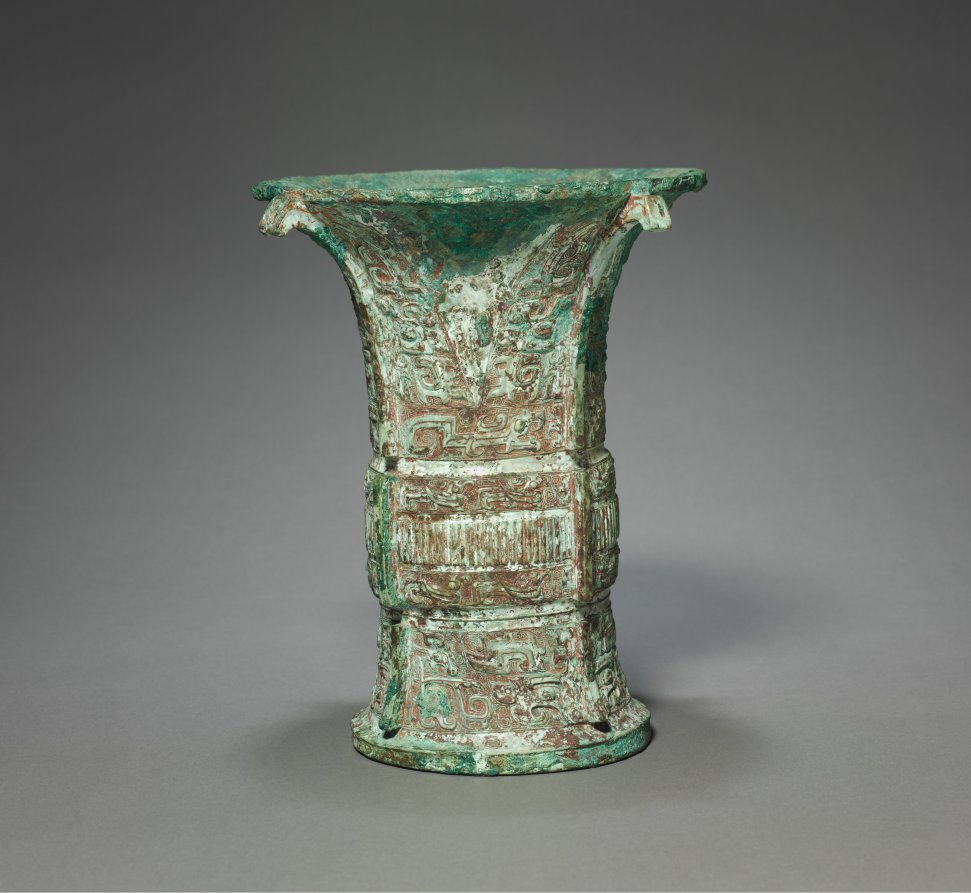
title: Wine Vessel (Fu Wu Zun)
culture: China, Western Zhou dynasty (c. 1046–771 BCE)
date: c. 1000–900 BCE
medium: bronze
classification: Metalwork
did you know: This vessel is decorated with dragons and taotie, a stylized monster face motif frequently found on ancient Chinese ritual bronzes.